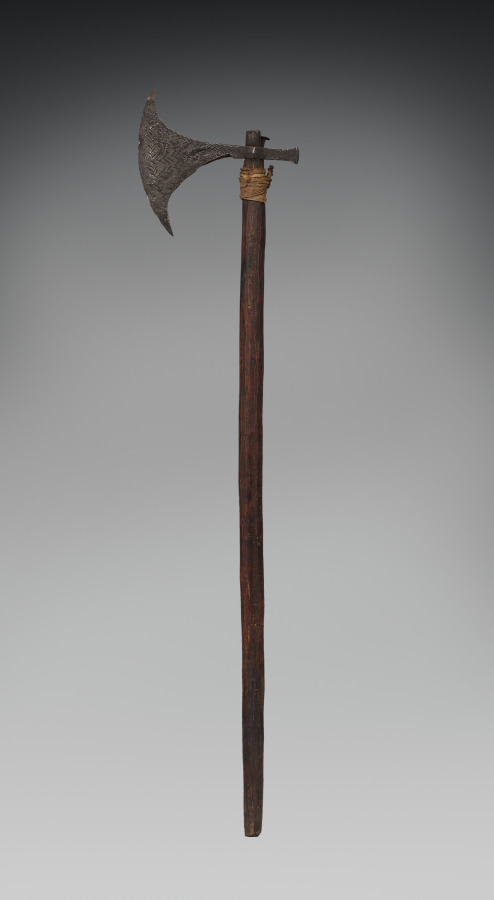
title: Axe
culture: Philippines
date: Before 1922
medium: Blade: metal; handle: wood and natural fibers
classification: Arms and Armor